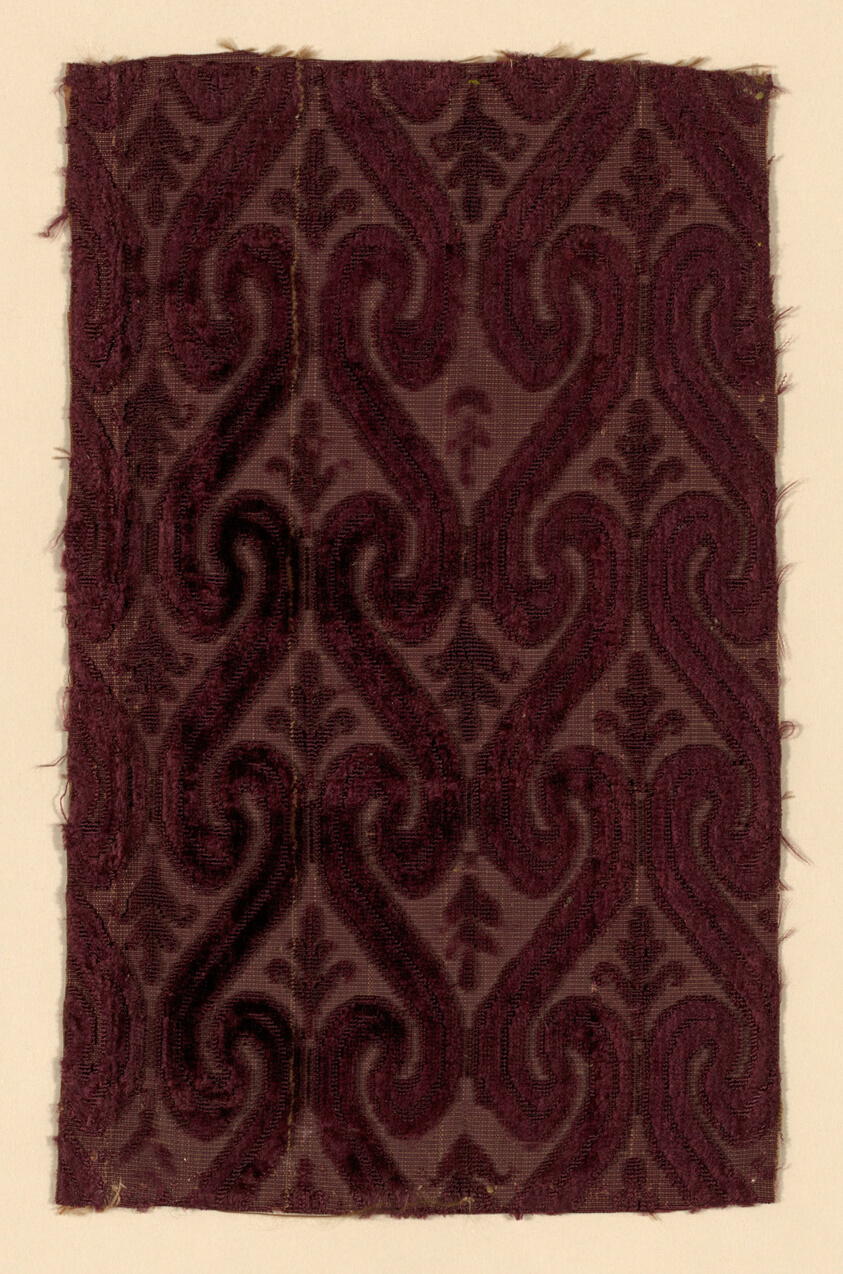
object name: Textile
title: Fragment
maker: Italy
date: c. 1600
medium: Silk, plain weave with supplementary pile warps forming cut, uncut, and voided velvet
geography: Italy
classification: textile; weaving - velvet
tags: fashion